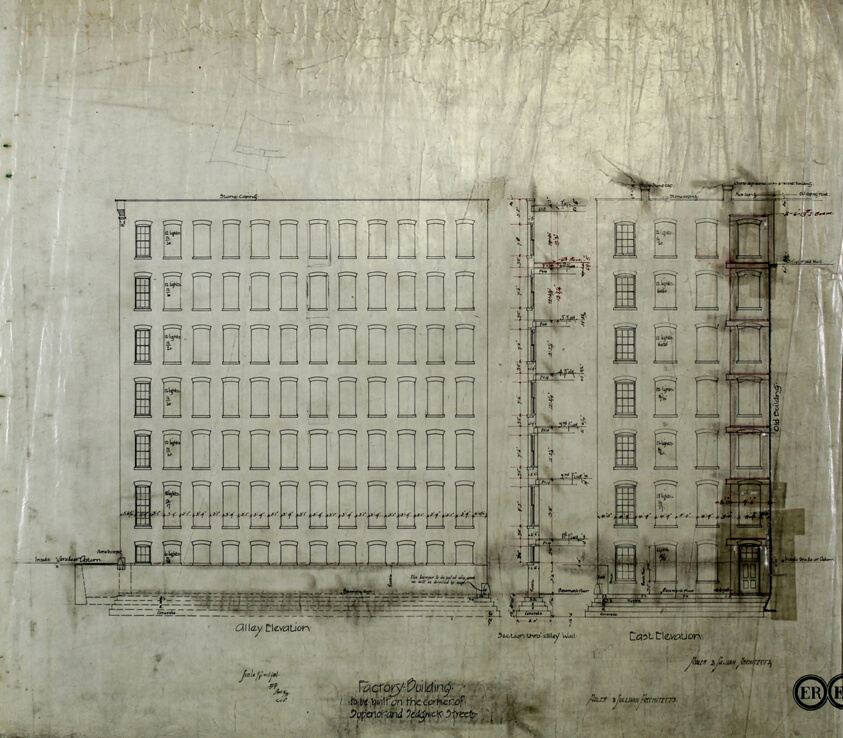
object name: Architectural Drawing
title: Brunswick Balke Collender Company Factory Building, Chicago, Illinois, Elevation and Section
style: 19th century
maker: Adler & Sullivan, Architects; American, 1883-1895; Delineator: Curth, William F.; American, 19th cen.; Delineator: Gill, Irving J.; American, 1870-1936; Delineator: Self, Charles J.; American, 19th Cen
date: 1891 Destroyed by fire on April 15, 1989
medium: Black and red ink on linen with pencil notes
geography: United States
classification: architectural drawing; architecture; architectural working drawing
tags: Chicago, office buildings, buildings, architecture, urban planning, design, elevations (building divisions), illinois